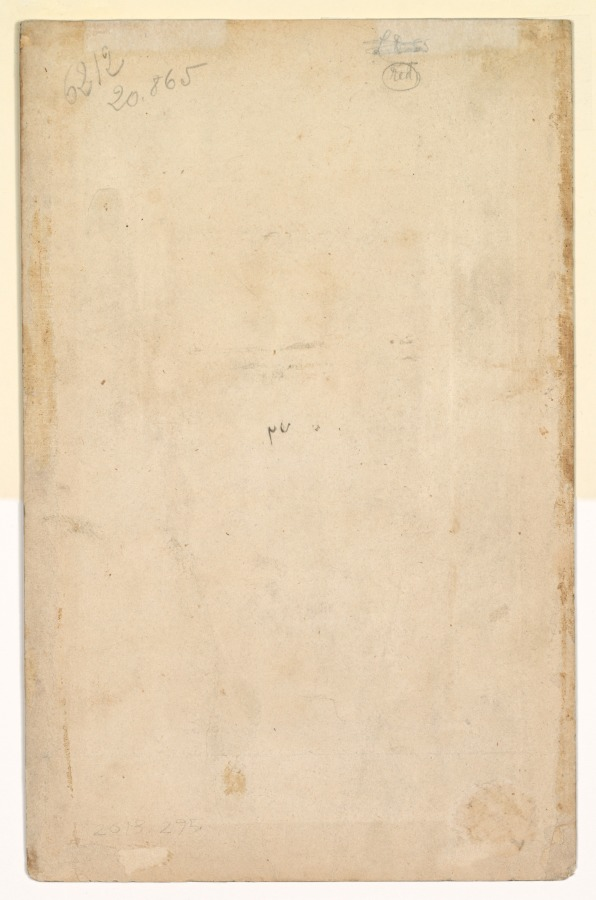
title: Portrait of a kneeling holy man, from the Prince Salim Album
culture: Mughal India, court of Akbar (reigned 1556–1605)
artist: attributed to Mir Sayyid Ali (Persian, active in Iran 1540s–50, active in India 1555–1580)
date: c. 1556–60; border c. 1602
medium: Gum tempera, ink, and gold on paper, laid down on an album page with cream borders decorated with gold flowers and geometric motifs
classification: Painting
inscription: [[verso, upper left corner]] 6212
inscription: [[verso, upper left corner]] 20.865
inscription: [[verso, upper center, below crossed out words and circled]] red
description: The kneeling figure is a charlatan holy man who wears the blue robe of a Sufi mystic. According to the inscriptions above and below the painting, he acts humble and pious for monetary gain rather than sincerity of devotion. Images of charlatan holy men recur in Mughal painting, including in the Cleveland Tuti-Nama. Mir Sayyid Ali was the first head of the Mughal workshop under Akbar. He was responsible for training Indian artists to adopt Persian sensibilities, admired by elites of the Islamic world during the 1400s to at least the 1700s.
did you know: In this sensitive portrayal of a charlatan holy man, the eyes are pale and empty.